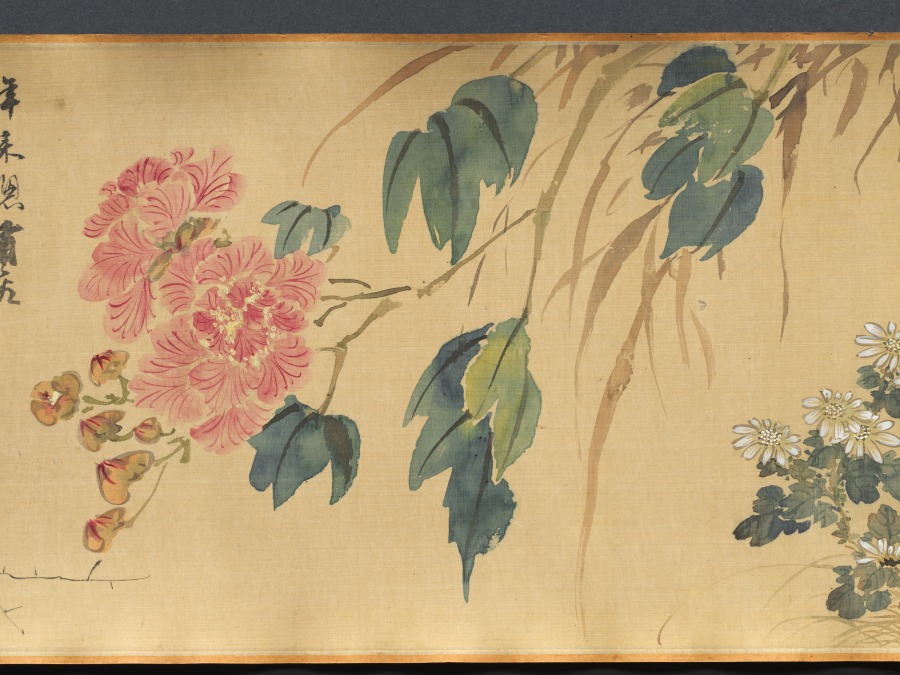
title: Flowers of Four Seasons, with Poems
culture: China, Ming dynasty (1368–1644)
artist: Wang Guxiang (Chinese, 1501–1568)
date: 1531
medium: handscroll; ink and light color on silk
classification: Painting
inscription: Artist's inscription, signature, and 15 seals. Ink Orchids. Sewn as pendants for the man of worth, swaying quiety, fragrance in the valley. [seal] Hsiao-chu ts'un Peony. Wiping his face, the young gentleman Ho [Ho Yen of Wei, Three Kingdoms] appears to have been powdered. His previous life was the perfume-stealing Han Shou [of Chin, 265–419 CE], the fragrance still lingers. [seal] Ts'un-wu chai. Flowering Crab Apple, New Bamboo. Shao-lin [Du Fu, 712–770] had to put down his brush. [Flowering Crab Apple]. Yü-k'o [Wen T'ung, d. 1079) in vain wrote poems about [Bamboo]. [seal] Yu-shih. Lotus Flowers. When she turns her head, half-hidden by a fan, and casts a glance, all the beautiful women become colorless. [seal] K'ang yüeh huai. Loquat. Ripeness in summer. [seal] Lu-chih. Pomegranate Flower. Whenever I remember you I will send my thoughts, but where have you gone--the [skirt] of pomegranate red? [seal] Wu-ho Sheng. Day Lily. Plant the day lily to forget sorrow. [seal] Yu-shih. Chrysanthemum. The untrammelled joy at the eastern fence. [seal] Lu-chih. Begonia. Comparing it to the beauties of Spring, and spreading them out as trimming for the stone steps. [seal] Yu-shih. Hibiscus. In recent years I have always enjoyed looking at flowers; instead of dark red I preferred pink ones. [seal] Jen-sheng i-lou. Narcissus, Camellia. The jade girdle left behind at Lo River. [Narcissus]. The precious pearls glitter before Spring. [Camellia]. [seal] Lu-chih. Heavenly Bamboo (Nandina domestica). A single branch in the wintry season. [seal] K'ang yüeh huai. Plum. Fragrant snow in the Lo-fou Mountains. [seal] Ts'un-wu chai. In the eleventh lunar month of the hsin-mao year of the Jiaqing era [1531], [I] imitated the boneless style of Yüan masters in sketching from life. Guxiang [seals] Yu-shih; Lu-chih. Translated by Wai-kam Ho/Lingyun Shih Liu (1980)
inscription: 2 colophons and 23 additional seals: 1 colophon dated 1632, and 2 seals of Li Jih-hua [Li Rihua] 李日華 (1565–1635); 1 colophon and 2 seals of Xiang Shengmo 項聖謨 (1597–1658); 3 seals of Liang Qingbiao 梁清標 (1620–1691); 6 seals of the Jiaqing 嘉慶 emperor (r. 1796–1820); 9 seals of Ch'eng Ch'i [Cheng Qi] 程琦 (1911–1988)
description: In this painting, flowers are loosely arranged by the seasons: narcissus and peony represent early spring; yellow loquat and lotus, summer; chrysanthemum, autumn; and the plum and evergreen bamboo, winter. The artist added to each flower a poetic line of calligraphy associating each plant with a historic or legendary figure. For example, the chrysanthemum, along with the line “The untrammeled joy at the eastern fence,” refers to the poet Tao Yuanming (died AD 427) who enjoyed chrysanthemums at the eastern fence in his garden. The scroll illustrates Wang Guxiang’s mastery of free brushwork, combining light monochrome ink with transparent colors. In his inscription, Wang says he used the “boneless” style without outlines as developed during the Yuan dynasty (1279–1368). Wang was a native of Changzhou, a city in southeast China known for its rich flora and fauna, and flower-and-bird painting tradition.